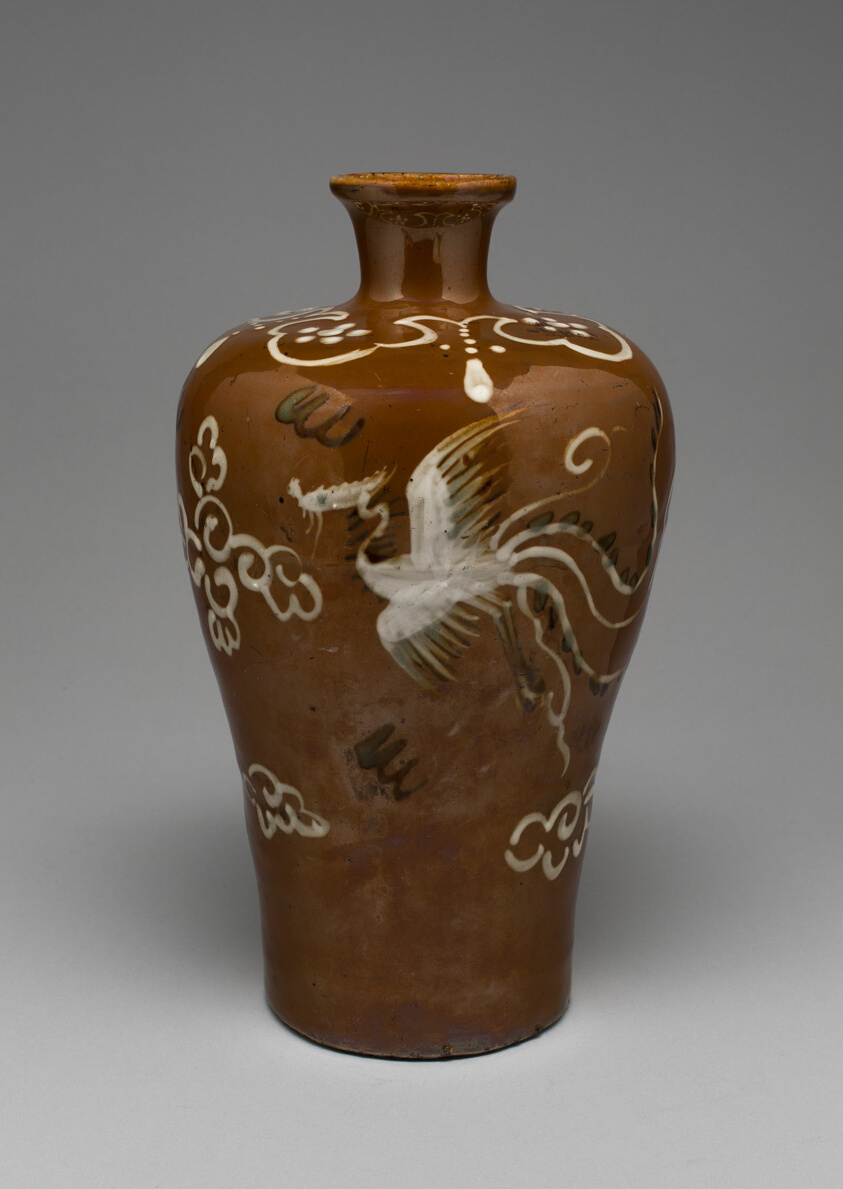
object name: Vessel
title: Bottle-Shaped Vase (Meiping) with Phoenixes amid Clouds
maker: China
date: Ming dynasty (1368–1644)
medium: Porcelain painted in overglaze enamels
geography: China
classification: porcelain; asian art; ceramics; vessel